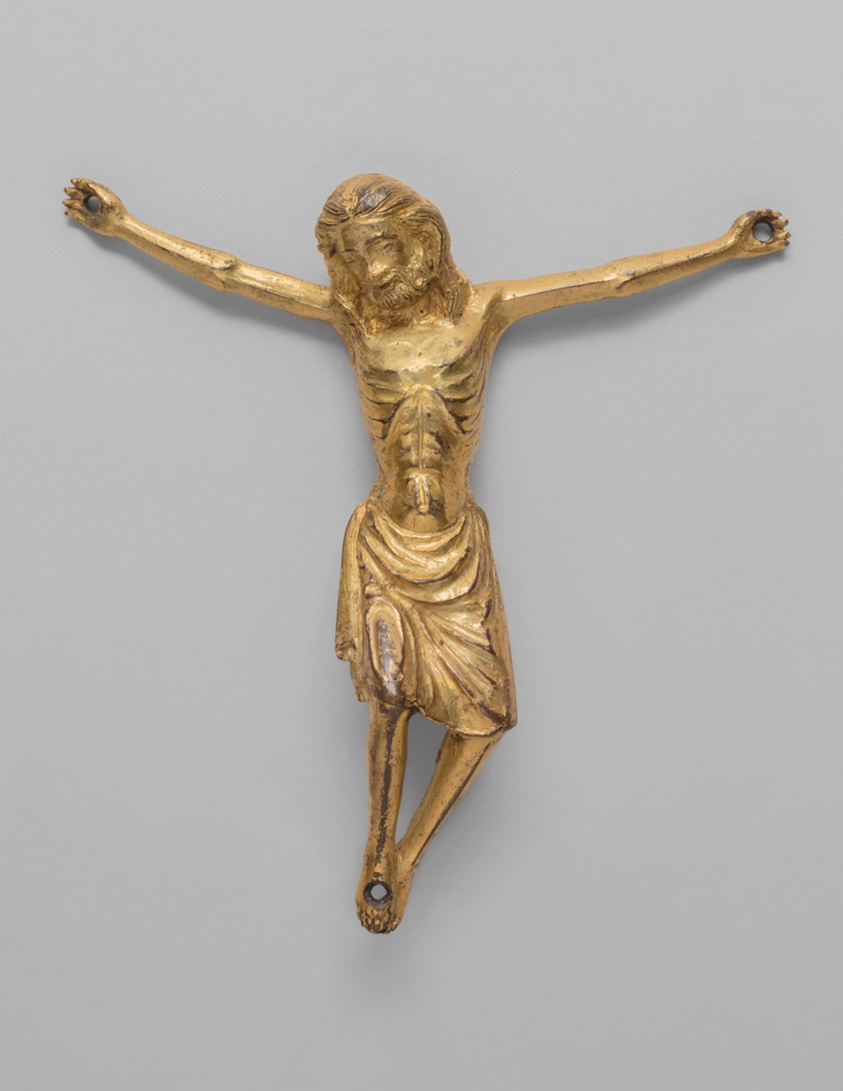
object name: Sculpture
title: Corpus from a Processional Cross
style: medieval, 14th century, 15th century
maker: Italian; Tuscany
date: 1370/1430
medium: Gilt bronze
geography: Tuscany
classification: crucifixion; ritual objects; sculpture; bronze; figure; Italian; jesus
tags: crucifixions, Christianity, Christian subjects, religious figures, religious, religion, biblical, figure, man, Jesus